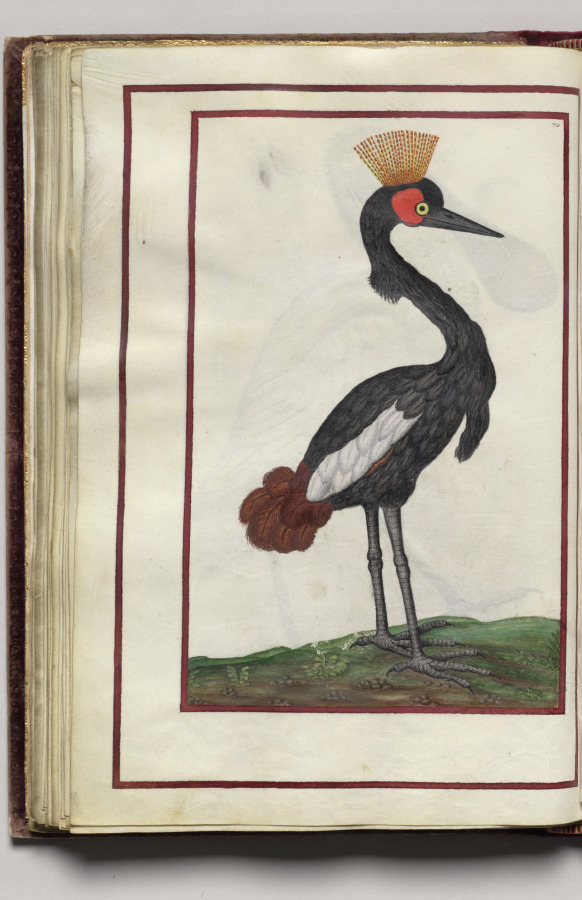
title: Black Bird with Crown, folio 35 (verso), from Florilegium (A Book of Flower Studies)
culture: France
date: 1608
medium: watercolor, ink, silver, and gold over occasional traces of pencil, on vellum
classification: Bound Volume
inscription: Dated: Poitiers 1608 (on frontispiece) Signed: On frontispiece in black ink, lower right: Van Kuyk Notation on drawing: Frontispiece: in pencil, lower margin: * élève de Van Kessel, peintre flammand (* in pencil also appears in front of Van Kuyk's name).